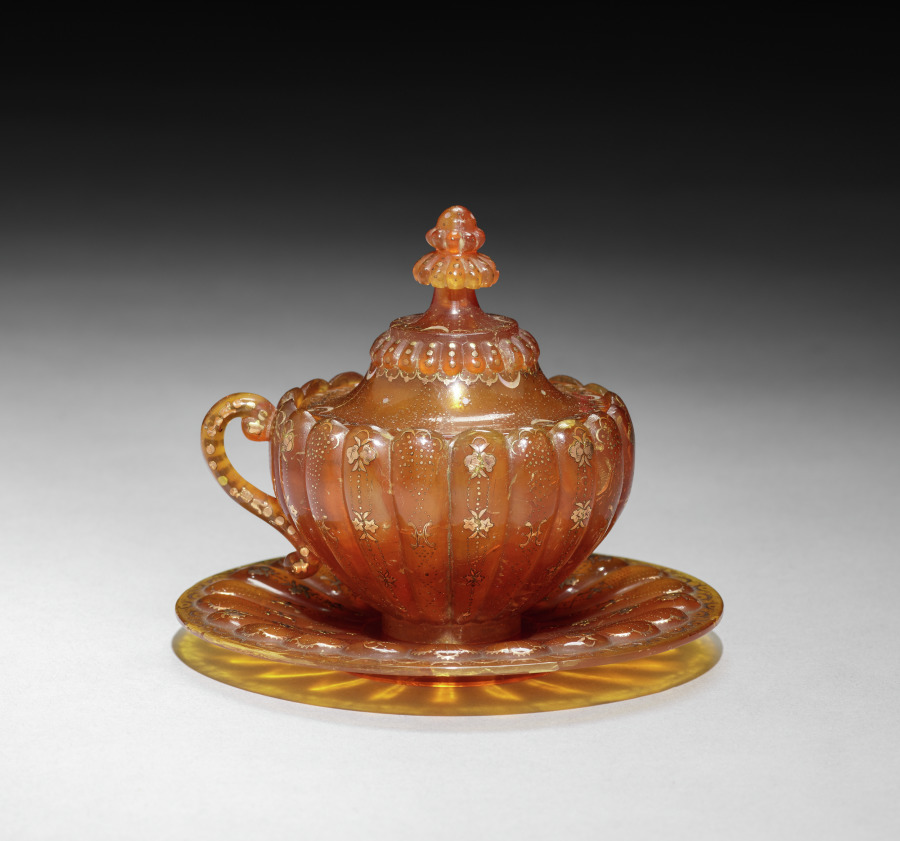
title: Covered Cup and Saucer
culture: France, 18th century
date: c. 1730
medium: amber decorated with inlaid gold and mother-of-pearl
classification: Miscellaneous